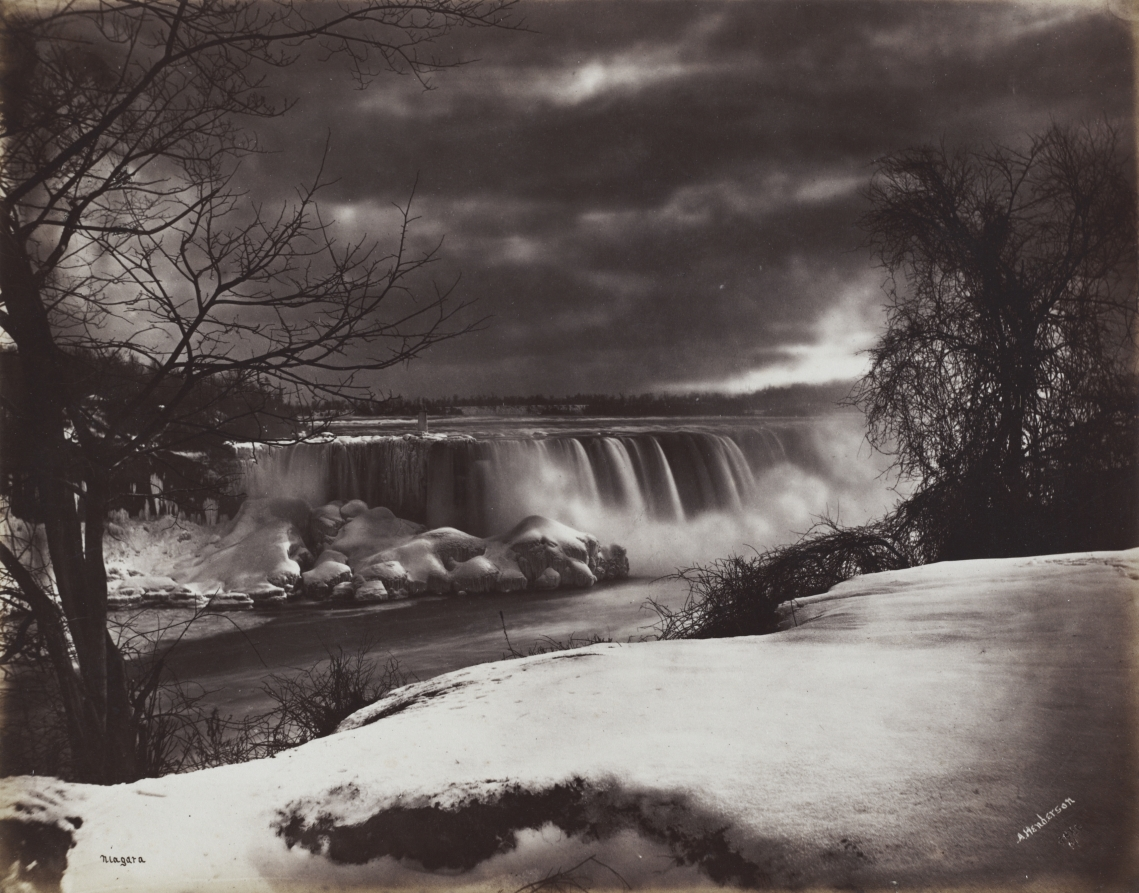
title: Falls of Niagara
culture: Canada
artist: Alexander Henderson (Canadian, 1831–1913)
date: 1860s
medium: albumen print from wet collodion negative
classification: Photograph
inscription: Written in ink on photo: "Niagara"; in negative: "A Henderson / [negative number obscured by spotting]"; in ink on recto of mount: "Falls of Niagara"